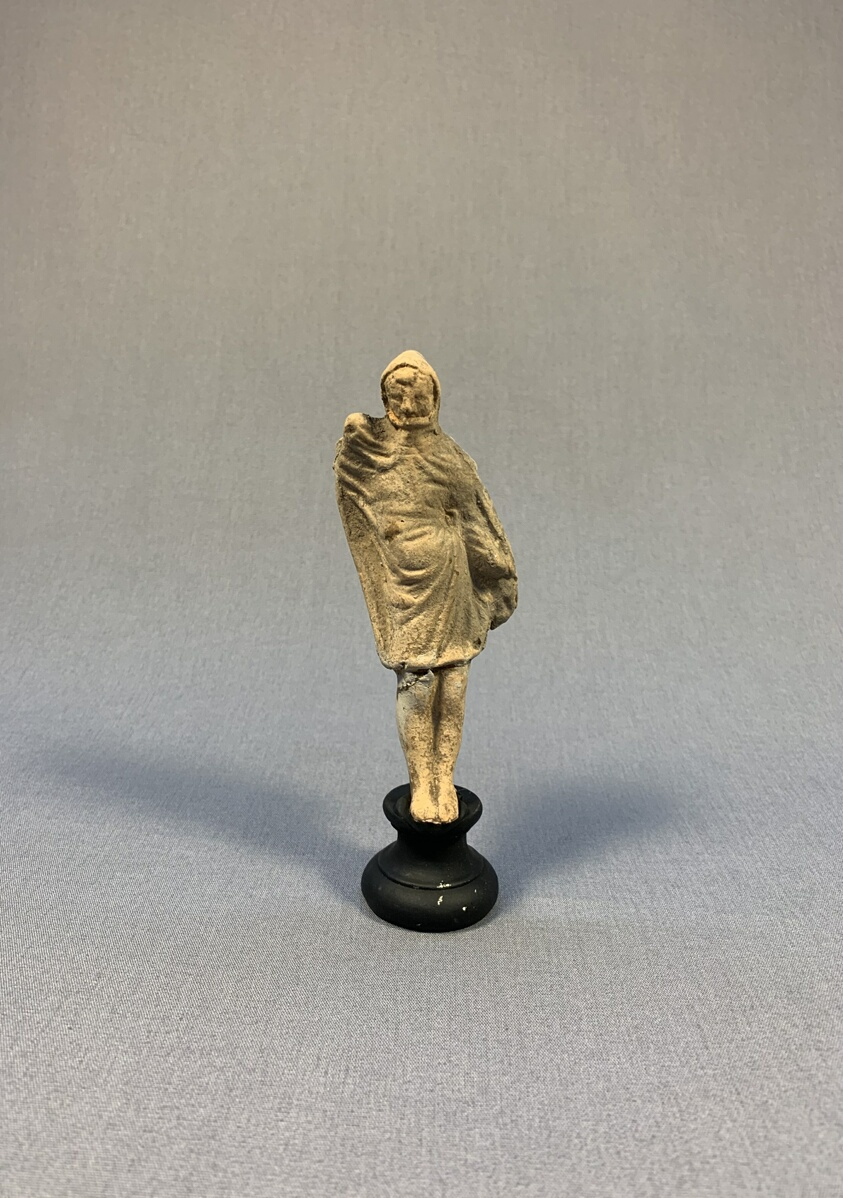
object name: Sculpture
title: Figurine of a Man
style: greek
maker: Greek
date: 4th-3rd century BCE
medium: terracotta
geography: Greece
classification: earthenware; ceramics; sculpture; ancient art